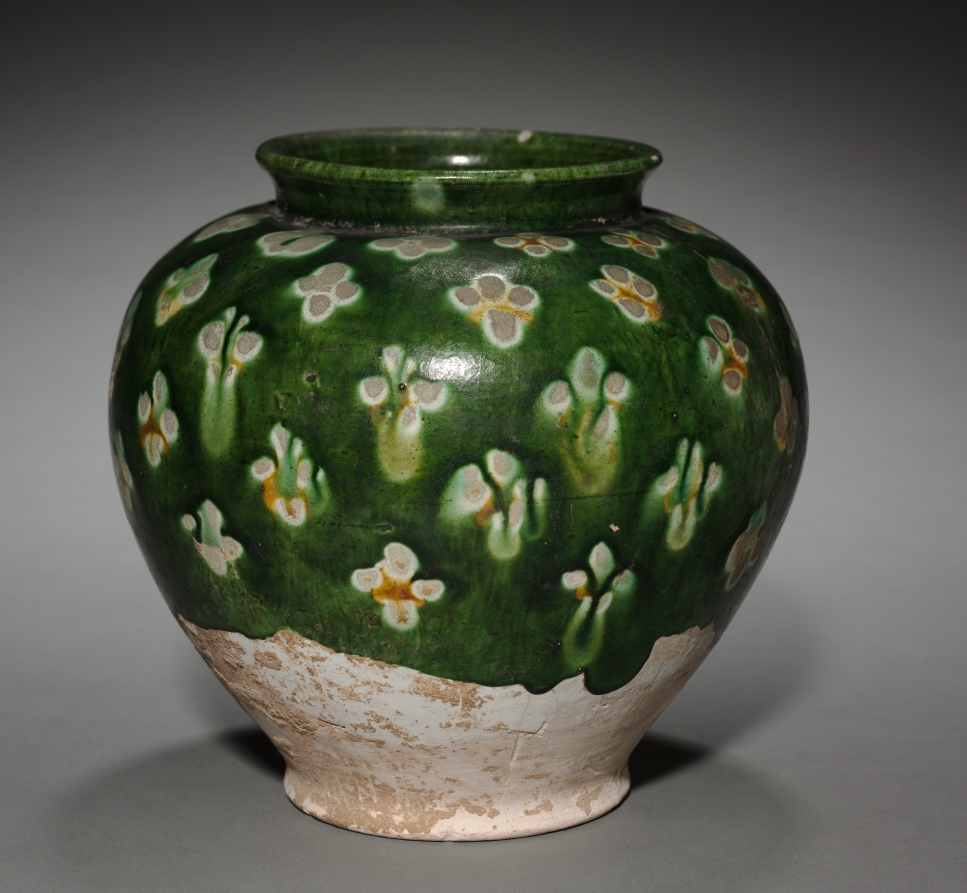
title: Jar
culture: China, Tang dynasty (618-907)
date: late 600s–700s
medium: glazed pinkish-buff earthenware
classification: Ceramic